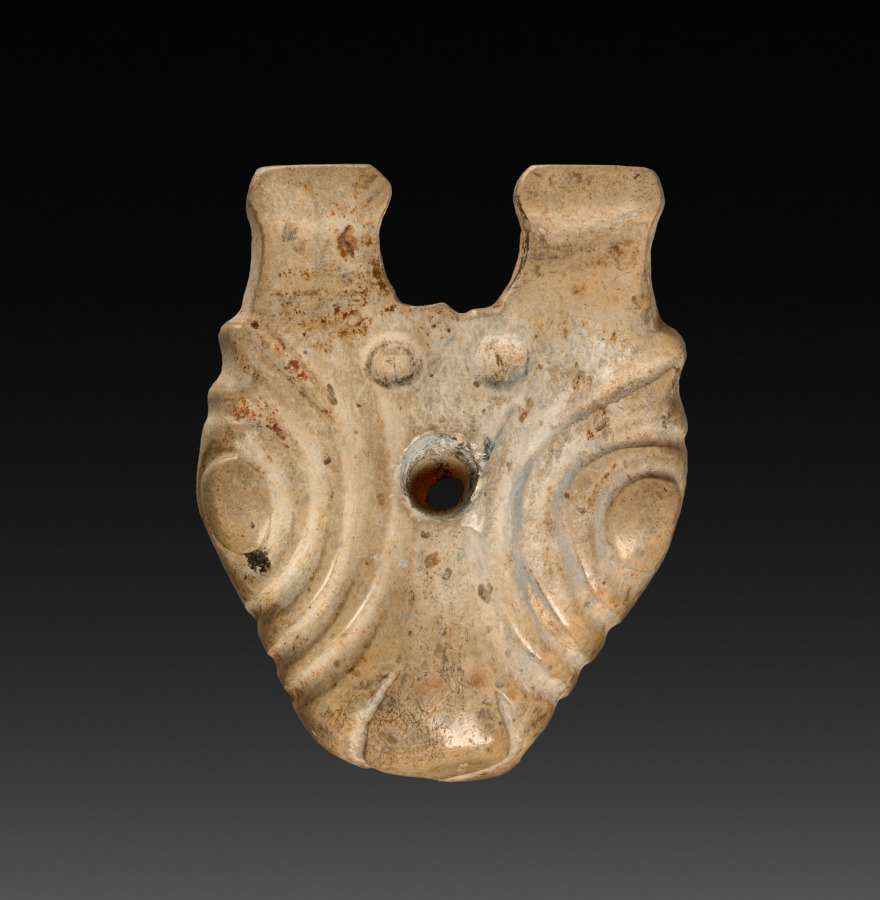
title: Bovine Mask with Capped Horns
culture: China, Shang dynasty (c. 1600–c. 1046 BCE) to Western Zhou dynasty (c. 1046–771 BCE)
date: 1400–1000 BCE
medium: jade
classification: Jade